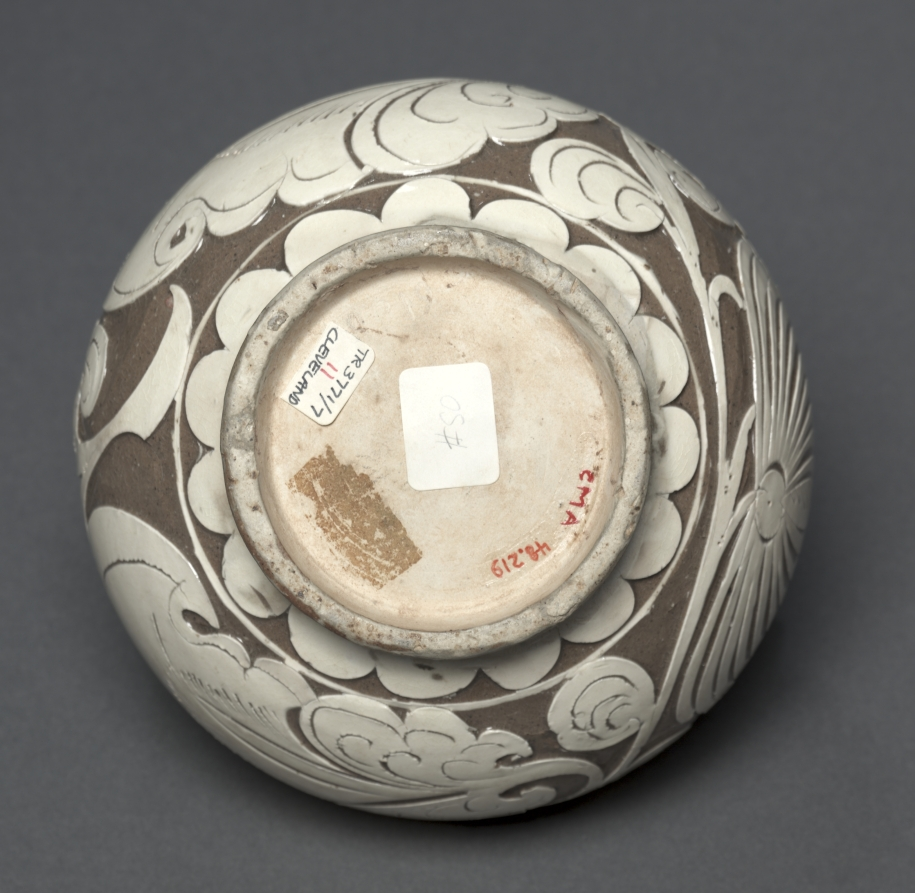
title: Spouted Ewer with Handle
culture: Northern China, Northern Song dynasty (960-1127)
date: 900s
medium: glazed stoneware with carved decoration, Cizhou ware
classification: Ceramic